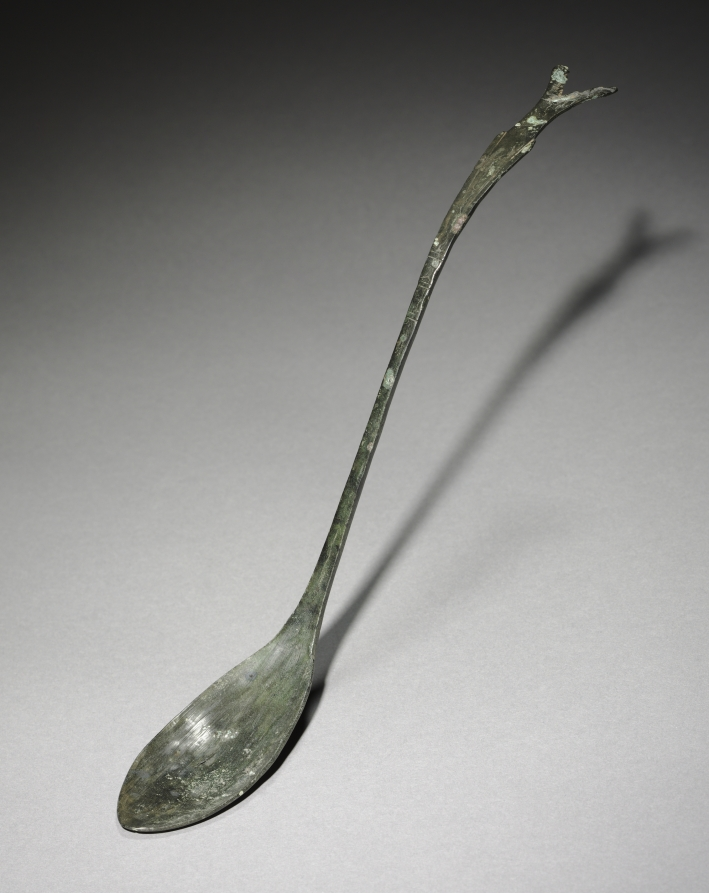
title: Spoon with Fish-Tail Design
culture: Korea, Goryeo dynasty (918–1392)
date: 918–1392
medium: bronze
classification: Metalwork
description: Many of Goryeo period spoons like this one feature a curved handle that splits into a jagged fishtail design. This fishtail design is not unique to Korea; it was also widely used in the area under the rule of two non-Han Chinese states: Liao (907–1125) and Jin (1115–1234). These seemingly ordinary objects testify to exciting material interactions between the Goryeo dynasty and non-Han Chinese northern states, which were often omitted from the official records.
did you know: Bronze spoons are the most common burial item. Scholars have proposed that toward the end of the 1300s, Koreans enjoyed meat-based soups more than any other dishes, explaining why spoons became common household items as well as burial goods.